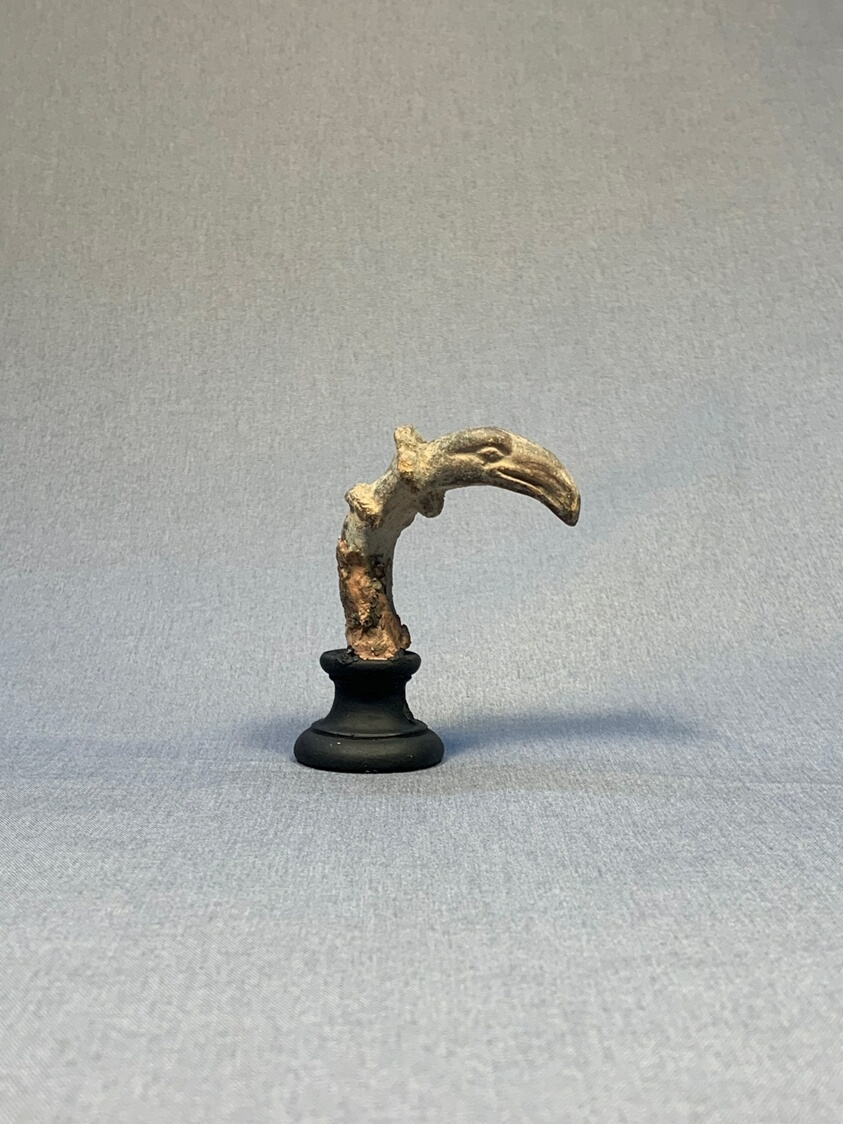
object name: Sculpture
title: Fragment of a Bird Head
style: greek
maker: Greek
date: 2nd/1st century BCE ?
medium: terracotta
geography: Greece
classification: earthenware; ceramics; sculpture; ancient art